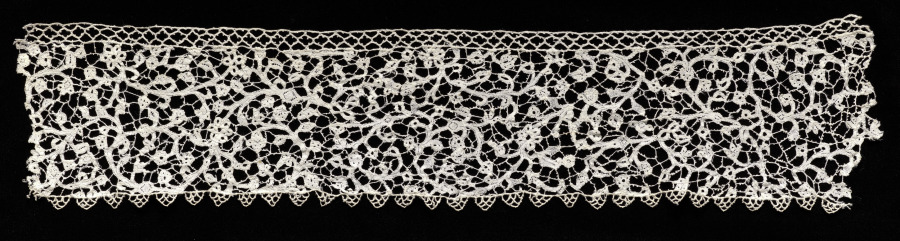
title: Lace Border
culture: Italy, Milan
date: 1600s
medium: Linen: bobbin lace (bride ground)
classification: Lace